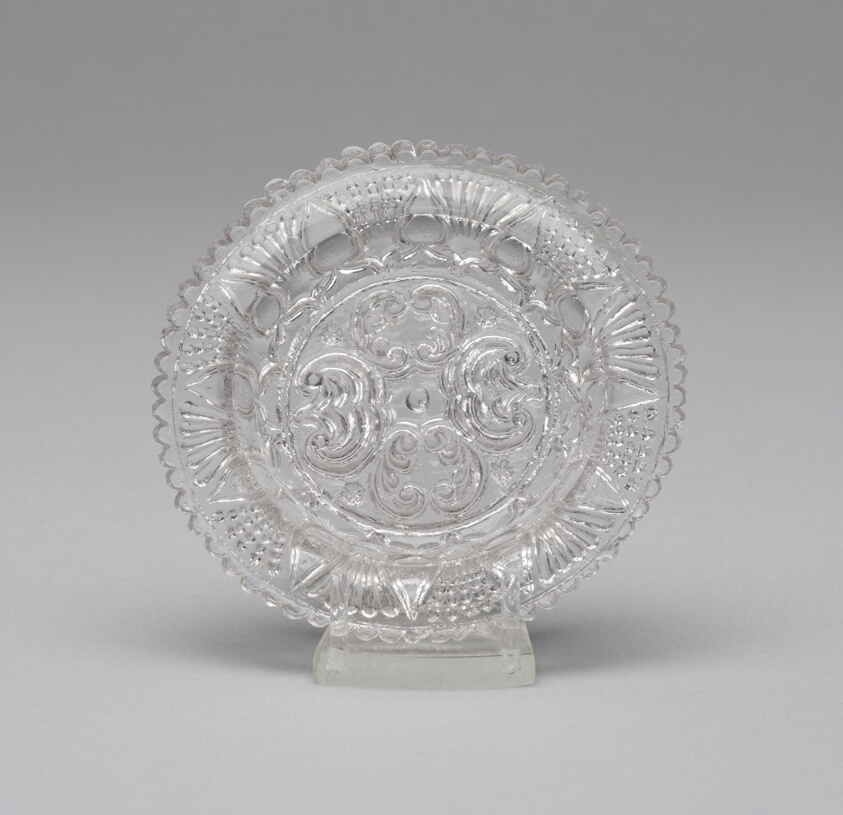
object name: Glass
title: Cup plate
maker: Fort Pitt Glass Works; American, 1827–c. 1903; Pittsburgh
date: 1830–35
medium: Pressed glass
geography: Pittsburgh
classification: plate (general, dish); glass; american decorative arts; american arts; decorative arts